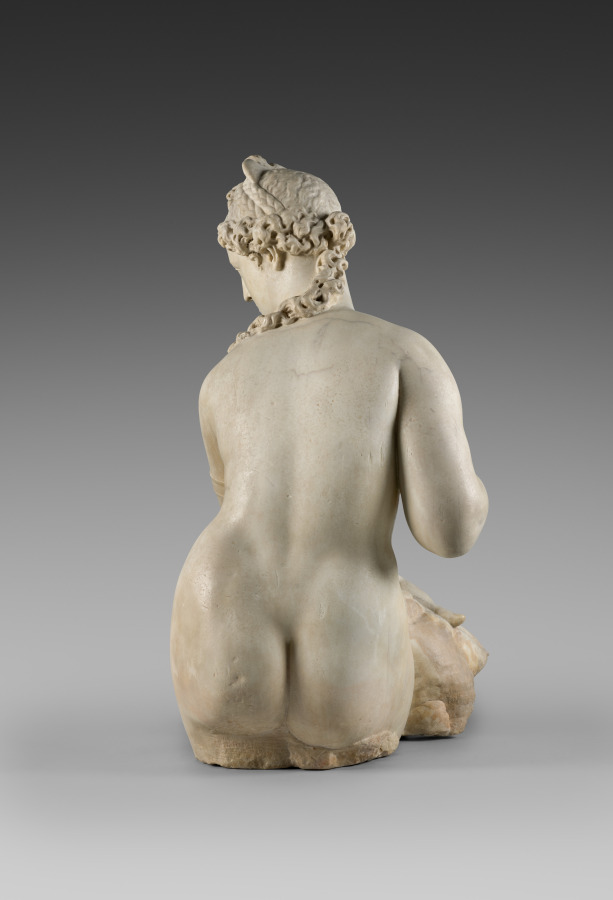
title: Fata Morgana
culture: Italy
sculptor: Giambologna (Flemish, active Italy, 1529–1608)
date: c. 1572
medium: Marble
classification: Sculpture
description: Commissioned by prominent banker Bernardo Vecchietti, whose surname means “old,” Fata Morgana took the name both of the nearby spring that fed the fountain she surmounted, and the legendary fairy who restored King Arthur’s youth. The Fata Morgana is one of only around a dozen sculptures in marble by Giambologna. The artist’s favorite subject was the female nude because of its capacity to showcase his extraordinary ability to model softness in hard stone and to convey dynamic movement. Her twisting pose invites the viewer to appreciate the Fata Morgana from every angle.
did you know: The sculpture originally appeared to emerge mysteriously from a cave within a constructed grotto.